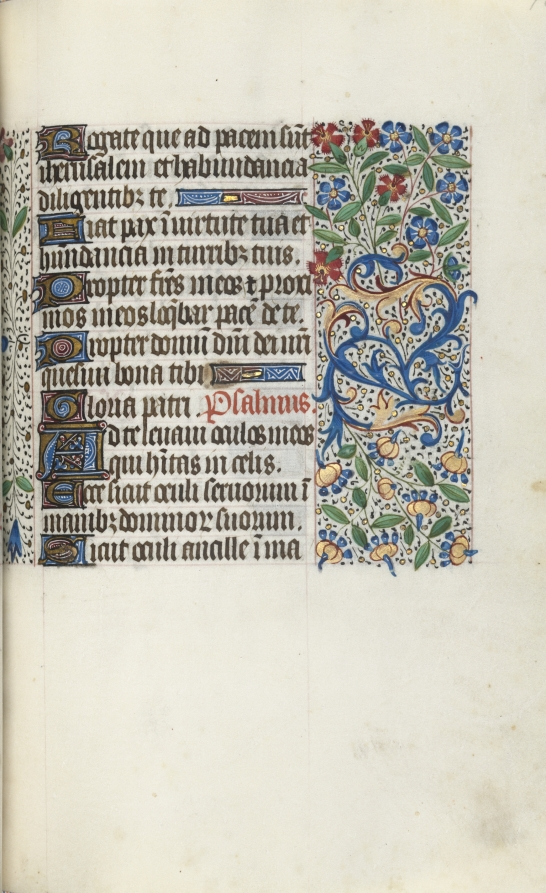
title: Book of Hours (Use of Rouen): fol. 70r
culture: France, Rouen, 15th century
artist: Master of the Geneva Latini (French, active Rouen, 1460–80)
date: c. 1470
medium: ink, tempera, and gold on vellum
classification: Bound Volume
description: In the late 1400s and early 1500s Rouen was an established and important center of book production. The city’s cathedral had a wealthy chapter that spent large sums of money to commission books and to maintain its extensive library. The stationers and booksellers would have likely been concentrated in or near the cathedral precinct. This artist, named after a manuscript now in Geneva, was Rouen’s principal illuminator during the second half of the 1400s.